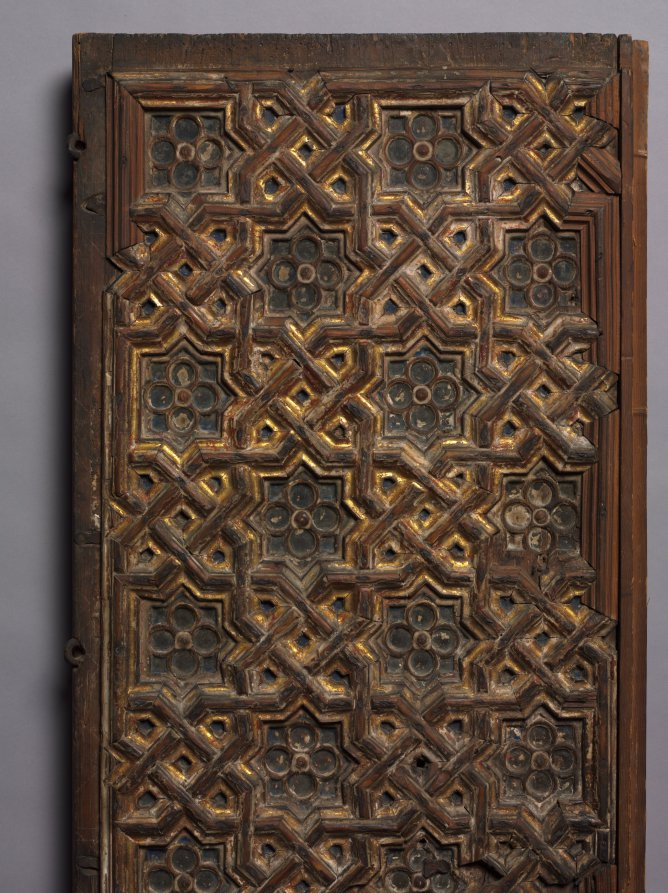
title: Door (left)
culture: Spain, early 15th century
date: early 1400s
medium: gilded and painted wood (pine)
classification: Furniture and woodwork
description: Typical of Muslim-inspired ornamentation, these doors reflect a love of geometric decoration stemming from a non-realistic artistic tradition. They consist of applied wood strips that form eight-point stars, flowers, and geometric interlace designs. Such designs are reflected in the tiles, ceramic vessels, and metalwork of Muslim-occupied Spain. The origin of the doors is not known, but they may have belonged to a palace or domestic residence. In 711, the Moors had invaded and conquered nearly the entire peninsula. During the next 750 years, independent Muslim states were established, and the entire area of Muslim control became known as Al-Andalus. Muslim philosophers and scientists developed knowledge in areas like medicine, optics, algebra, chemistry, and geometry, as seen here. Typical of Muslim-inspired ornamentation, these doors reflect a love of geometric decoration stemming from a non-realistic artistic tradition. They consist of applied wood strips that form eight-point stars, flowers, and geometric interlace designs. Such designs are reflected in the tiles, ceramic vessels, and metalwork of Muslim-occupied Spain. The origin of the doors is not known, but they may have belonged to a palace or domestic residence.